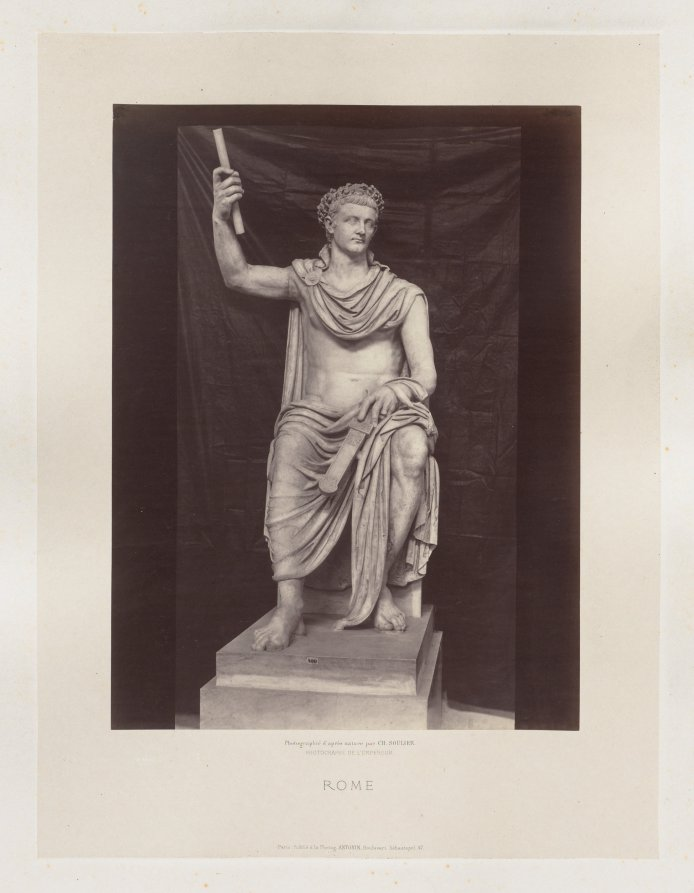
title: Statue de Tibere, Vatican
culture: France, 19th century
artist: Charles Soulier (French, 1840–1875)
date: c. 1860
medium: albumen print from a collodion negative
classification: Photograph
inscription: Albumen print from a collodion negative Imprinted on primary mount: "Photographié après nature par CH. SOULIER/PHOTOGRAPHE de L'EMPEREUR./ROME/Paris. Publié à la Photog. ANTONIN. Boulevard Sébastopol. 47" Written in pencil on recto of mount: "Statue de Tibere, Vatican" Written in pencil on verso: "37" "IT-11"